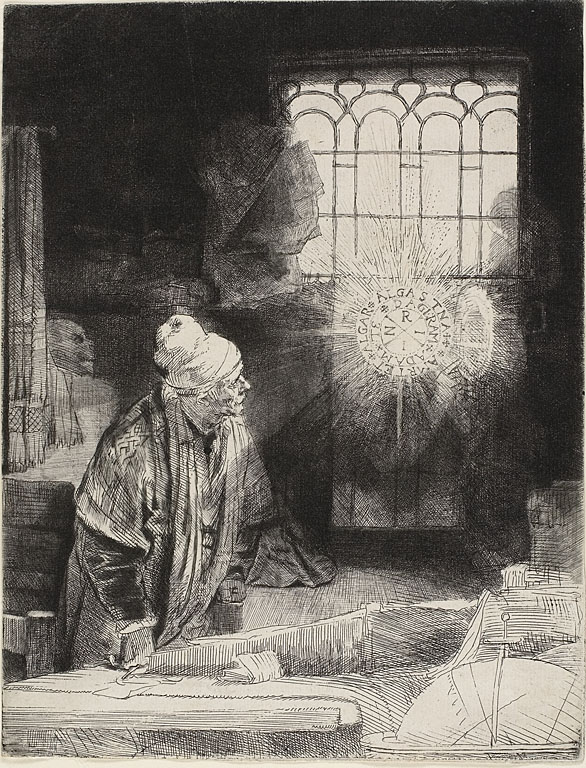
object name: Print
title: A Scholar in His Study (Faust)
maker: Rembrandt van Rijn (Dutch, 1606-1669)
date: c. 1652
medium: Etching, drypoint and engraving on white laid paper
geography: Holland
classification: etching; print; prints and drawing; paper; drypoint; engraving